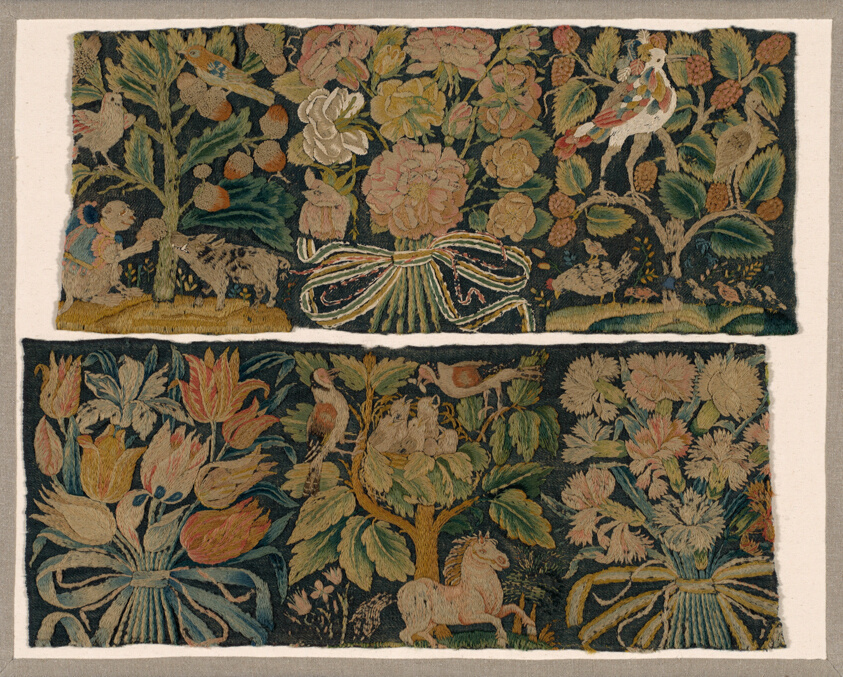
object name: Textile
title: Two Fragments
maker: England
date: c. 1675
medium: Wool, twill weave; embroidered with wool yarns and linen thread in back, cross, running, satin and split stitches; couching; French knots and laid work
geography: England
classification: textile; needlework (visual works)